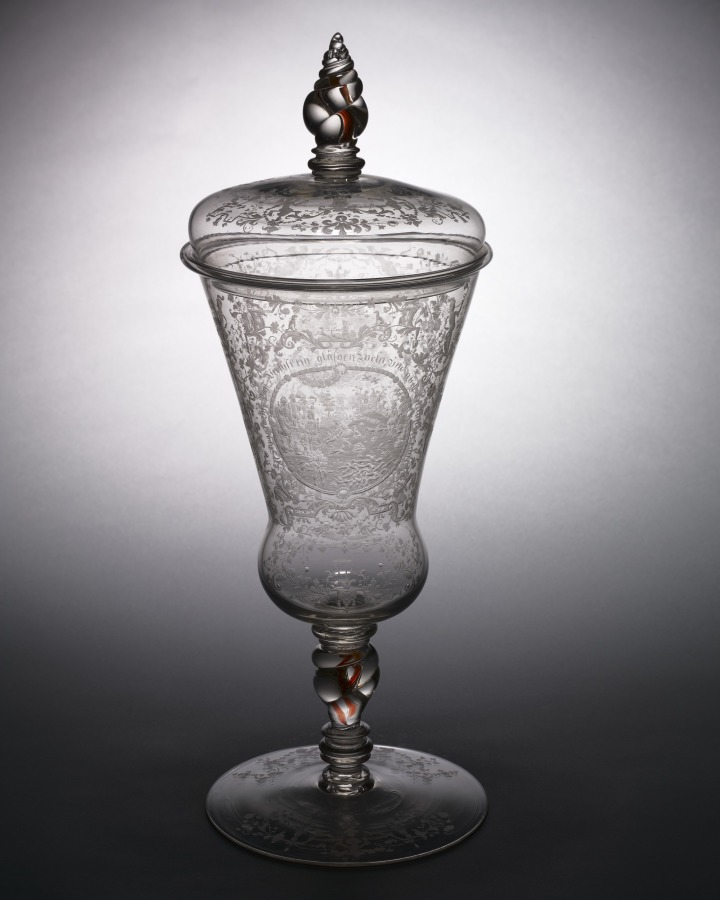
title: Standing Cup with Cover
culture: Bohemia, 18th century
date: c. 1715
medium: glass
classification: Glass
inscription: the German inscription engraved around the hunting scene translates as: When sorrow torments us enjoy a glass of wine and also the joy of a hunt; engraved on the opposite side: F.A.K.J.P.V.C.F.Z.S. (Friedrich August Keonig in Polen und Chur Fuerst zu Sachsen).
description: Engraved with arms of Saxony-Poland and Hunting Scene.